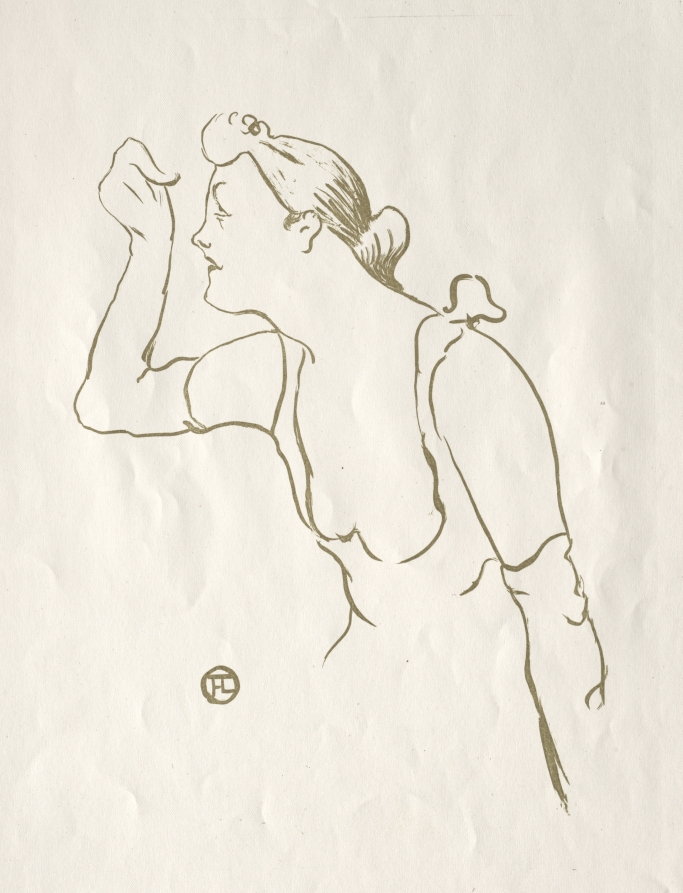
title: Paula Brébion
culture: France, 19th century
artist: Henri de Toulouse-Lautrec (French, 1864–1901)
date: 1893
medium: lithograph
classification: Print